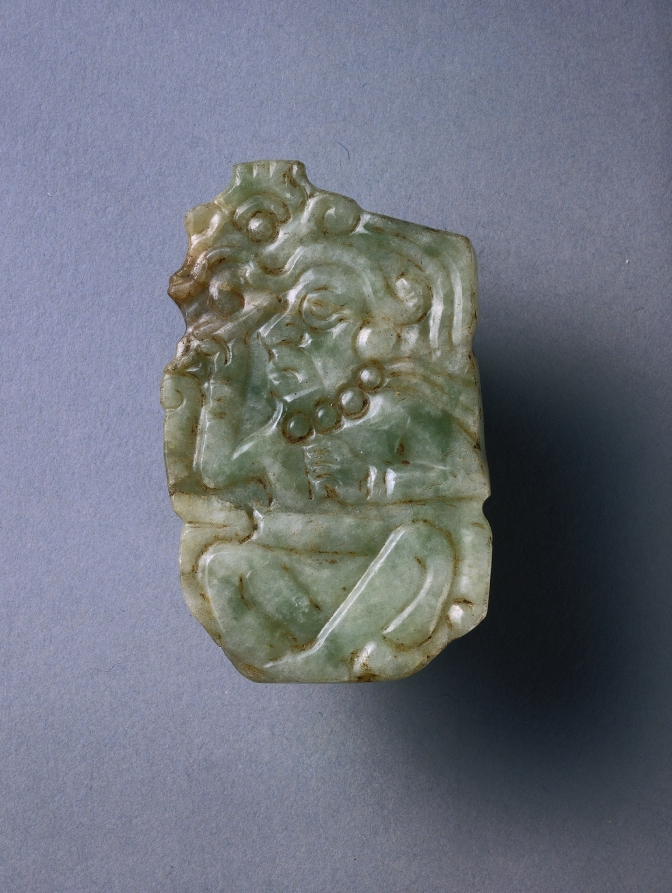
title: Pendant with Scribe Figure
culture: Mexico, Mixtec?, 8th-11th Century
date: c. 700–1000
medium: jade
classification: Jade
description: The seated figure's high status is indicated by an elaborate headdress and jewelry, including earplugs, a necklace, and bracelets. Iin his right hand is a brush, perhaps for painting a book or mural.